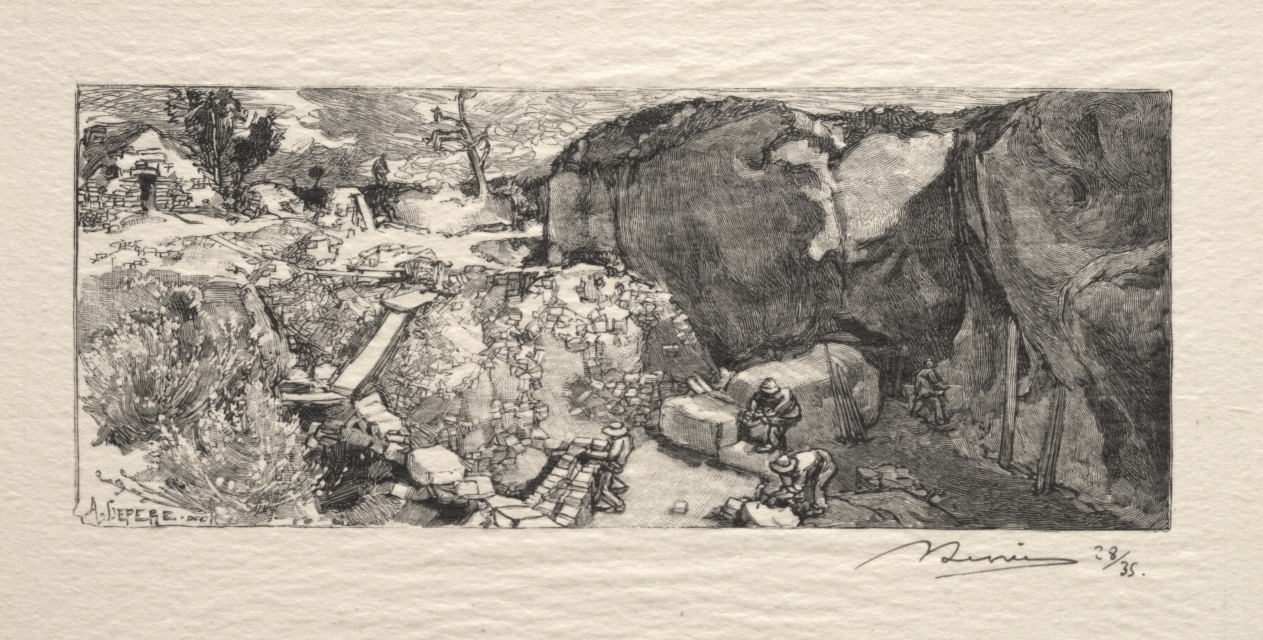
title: La Carrière de grès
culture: France, 19th century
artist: Auguste Louis Lepère (French, 1849–1918)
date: 1890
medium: wood engraving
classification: Print